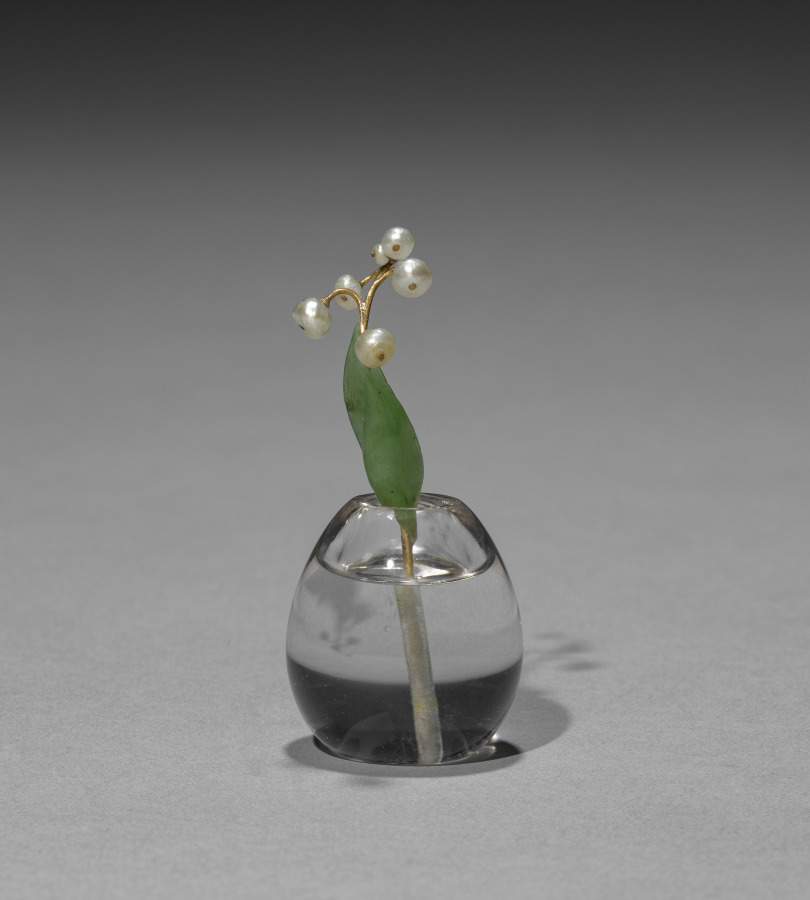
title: Flower Study of a Miniature Lily of the Valley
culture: Russia, St. Petersburg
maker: House of Fabergé (Russian, 1842–1918)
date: c. 1885–1915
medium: pearls, jade, rock crystal, gold, diamonds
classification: Miscellaneous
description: A small, carved rock crystal vase holds this lily of the valley study. The pearls, forming the flower’s buds, are drilled and attached to the remarkably slim gold stem. The hand-cut nephrite (jade) leaves enhance the naturalistic aura of the flower. Fabergé’s inspiration for his flower studies is said to have come from the floral brooches of precious stones that were made in the 1700s for Catherine the Great as well as from the Japanese art of flower arranging, known as ikebana.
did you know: Small and delicate, Fabergé’s flower studies were given as intimate gifts to friends by Tsarina Alexandra and others in the court. She kept them in all the palaces as a reminder of spring during the harsh Russian winters.